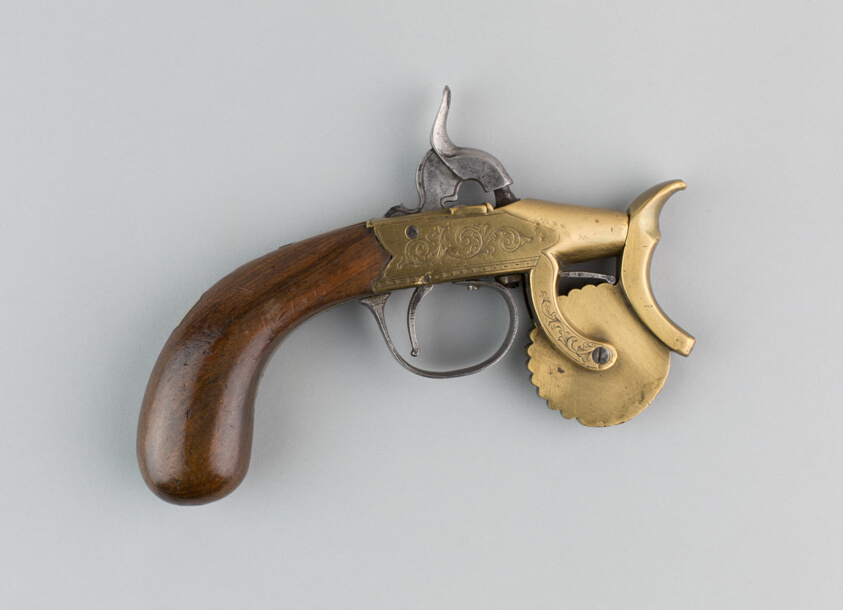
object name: Arms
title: Percussion Powder Tester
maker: Belgian, Probably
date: c. 1830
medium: Walnut, brass, and steel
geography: Europe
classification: firearm-accessory; arms; arms and armor